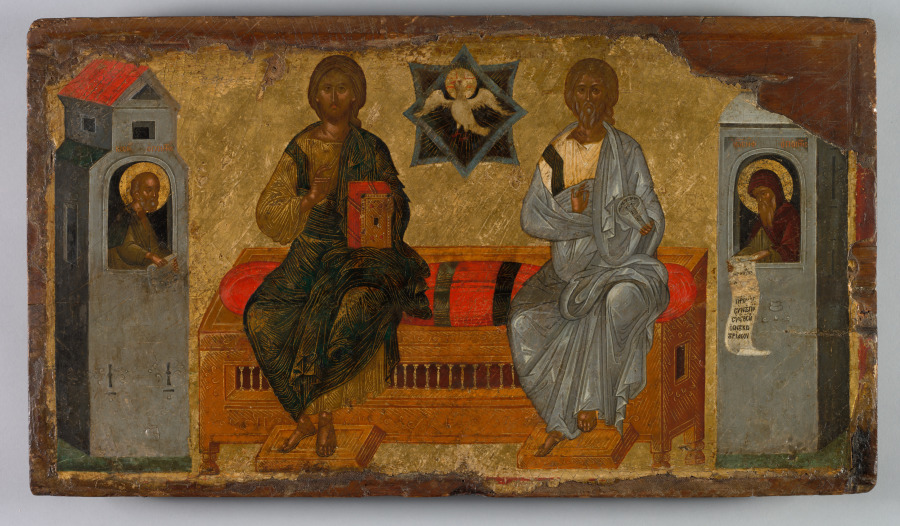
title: Icon of the New Testament Trinity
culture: Byzantium, Constantinople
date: c. 1450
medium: Tempera and gold on wood panel (poplar)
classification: Painting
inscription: Ο ΠΑΛΑΙΟC ΤΗΩ- God the Father as Christ in old age on right identified on either side of his head in gold, outlined in red.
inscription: ΤΟ ΑΙΟΝ ΠΝΑ- The Holy Spirit, identified by dove in gold outlined in red.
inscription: ΙΩCHΦ Ο ΠΟΙΗΤΗC- St. Joseph the Hymnographer identified on the left by gold letters, outlined in red.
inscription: ΚΟCΜ Ο ΠΟΙΗΤΗC- St. Kosmas the Hymnopgrapher identified on the right in gold letters in red outline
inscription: "'together with...you my God' and 'your dominion" in Scroll of Kosmas on the right.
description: This icon depicts an important subject in Orthodox Christian art, the three corresponding figures of the single godhead known as the Holy Trinity. The Trinity is represented here in a composition known as the “New Testament Trinity,” which features Christ and God the Father seated on a bench with a dove representing the Holy Spirit between them. The central field is occupied by a large wooden throne with gold highlights on which Christ (left) and the Ancient of the Days (God the Father as Christ in old age) are seated. The Holy Spirit, in the form of a dove, hovers within an eight-pointed star that signifies the eighth day, the future eon. On either side of the Trinity are two hymnographers, authors of hymns of praise, both identified by gold letters outlined in red—Saint Kosmas (about 675–752) on the left and Saint Joseph (about 812/818–about 886) on the right. They both suspend scrolls from round-arched windows. The icon likely was part of a church templon, the barrier that separated the nave from the sanctuary in an Orthodox church. It is not signed or dated; however, careful analysis of the painting’s style and technique places it in Constantinople around 1450, just prior to the city’s fall to the Ottomans in 1453. It represents a moment when Byzantine painting reached a brilliant crescendo.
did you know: More than just a breakfast food, eggs are used to make the tempera paint used in this painting.